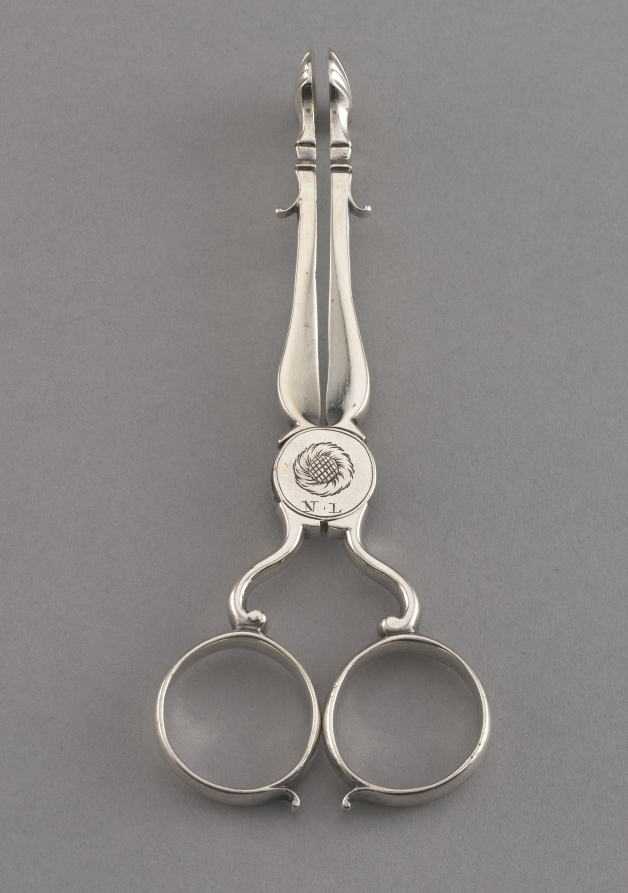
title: Sugar Scissors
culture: America, Massachusetts, Boston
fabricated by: Jacob Hurd (American, 1702–1758)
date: c. 1750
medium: silver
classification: Silver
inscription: engraved: NL in block letters below engraved flower on pivot.